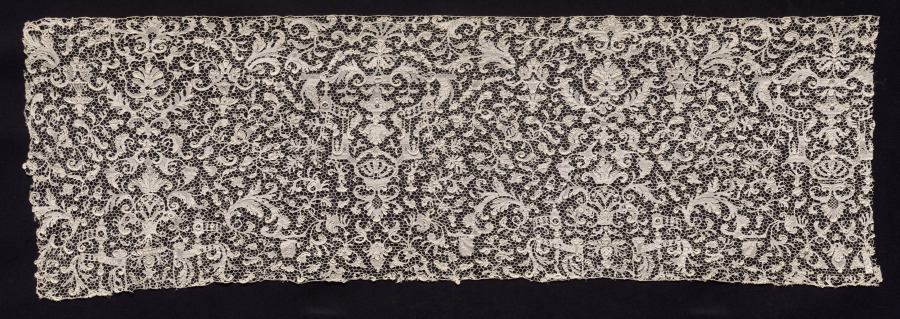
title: Fragment of Lace Flounce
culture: France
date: 1700–1715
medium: Linen: needle lace (Point de France)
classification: Lace